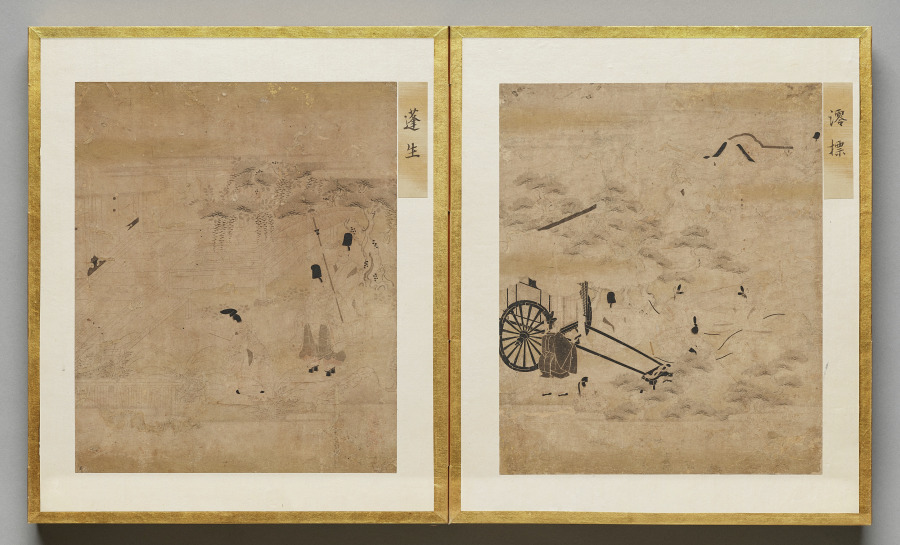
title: Channel Buoys from Album of Illustrations for the Tale of Genji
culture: Japan, Edo period (1615–1868)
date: 1600s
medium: painting in an accordion-style album; ink, light color, and gold on paper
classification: Bound Volume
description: This album contains illustrations for the classic literary work the Tale of Genji, authored in the 1000s by Murasaki Shikibu, an aristocrat of the Heian period (794–1185) court. The scenes are painted in the “white drawing” (hakubyō) mode, in which a fine ink line is used to depict figures and spaces with great subtlety, punctuated only occasionally by traces of red pigment for a character’s lips, a detail of a garment, or a decorative element. These two scenes illustrate episodes from the chapters “Thin Veil of Cloud” (Usugumo) and “Barrier Gate” (Sekiya).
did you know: The illustrations are identified by chapter title in cartouches to the upper right of the paintings.